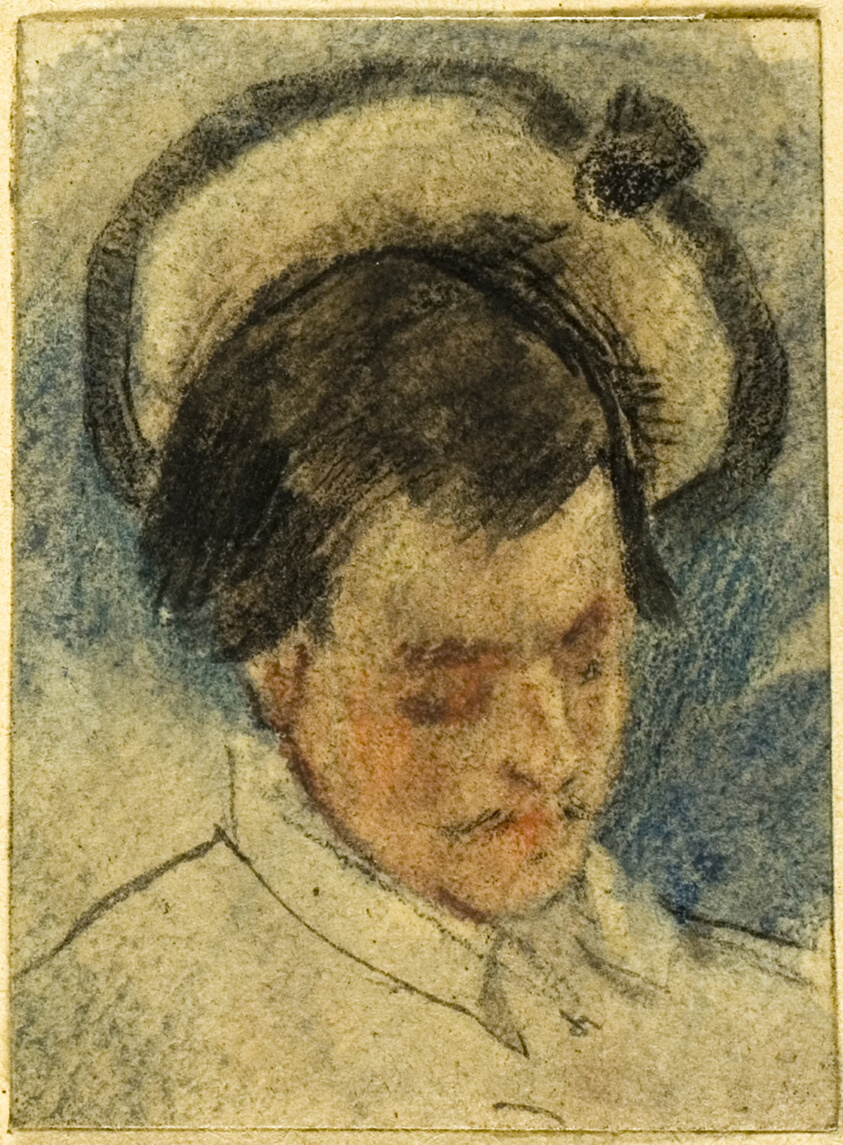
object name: Drawing and Watercolor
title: Untitled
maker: Félicien Rops (Belgian, 1833-1898)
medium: Colored pencil and graphite (recto) and black pencil (verso) on tan laid paper, tipped onto tan wove paper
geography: Belgium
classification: colored pencil; drawings (visual works); prints and drawing